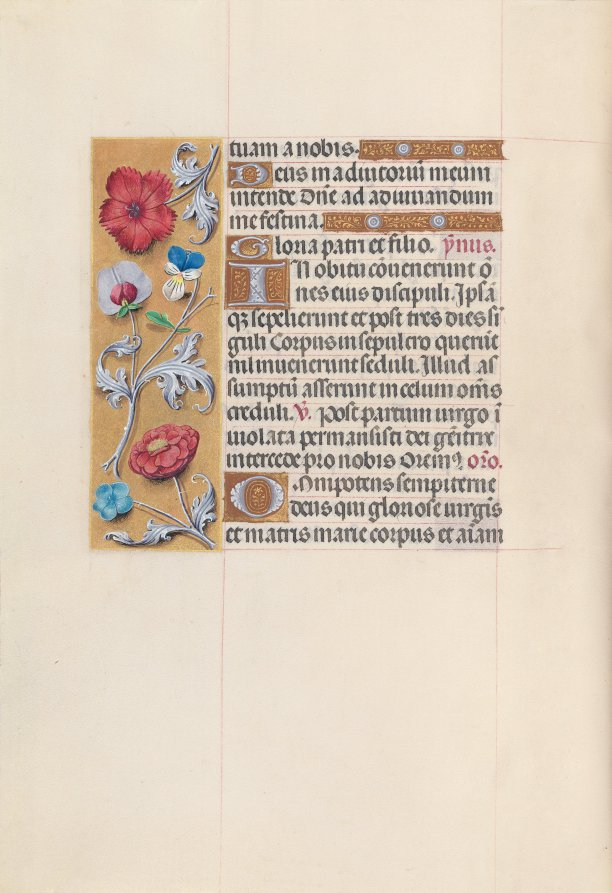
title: Hours of Queen Isabella the Catholic, Queen of Spain: Fol. 85v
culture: Flanders, Ghent and Bruges, late 15th century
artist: Master of the First Prayerbook of Maximillian (Flemish, c. 1444–1519)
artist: and Associates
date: c. 1500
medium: ink, tempera, and gold on vellum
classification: Bound Volume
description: This manuscript was illuminated by a circle of at least five highly organized manuscript painters active in the Flemish cities of Ghent and Bruges. The principal illuminator was Alexander Bening, who painted the majority of the book's miniatures. Manuscripts produced by this circle of artists are renowned for the decoration of their borders, which typically feature a rich variety of realistically-painted flowers, birds, and butterflies. This prayer book, called a book of hours, was intended not for a cleric, but for the private devotions of a lay person-in this case, Isabella the Catholic, Queen of Spain (1451-1504). Isabella's coat of arms embellishes the book's frontispiece. It is unlikely that the book was commissioned by the Queen herself; rather, she probably received it as a diplomatic gift from someone courting her patronage, perhaps Cardinal Francisco Jimenez de Cisneros. A Franciscan friar, Jimenez was dependent upon Isabella for his advancement, first to the post of Queen's confessor in 1492, and then to Archbishop of Toledo in 1495.